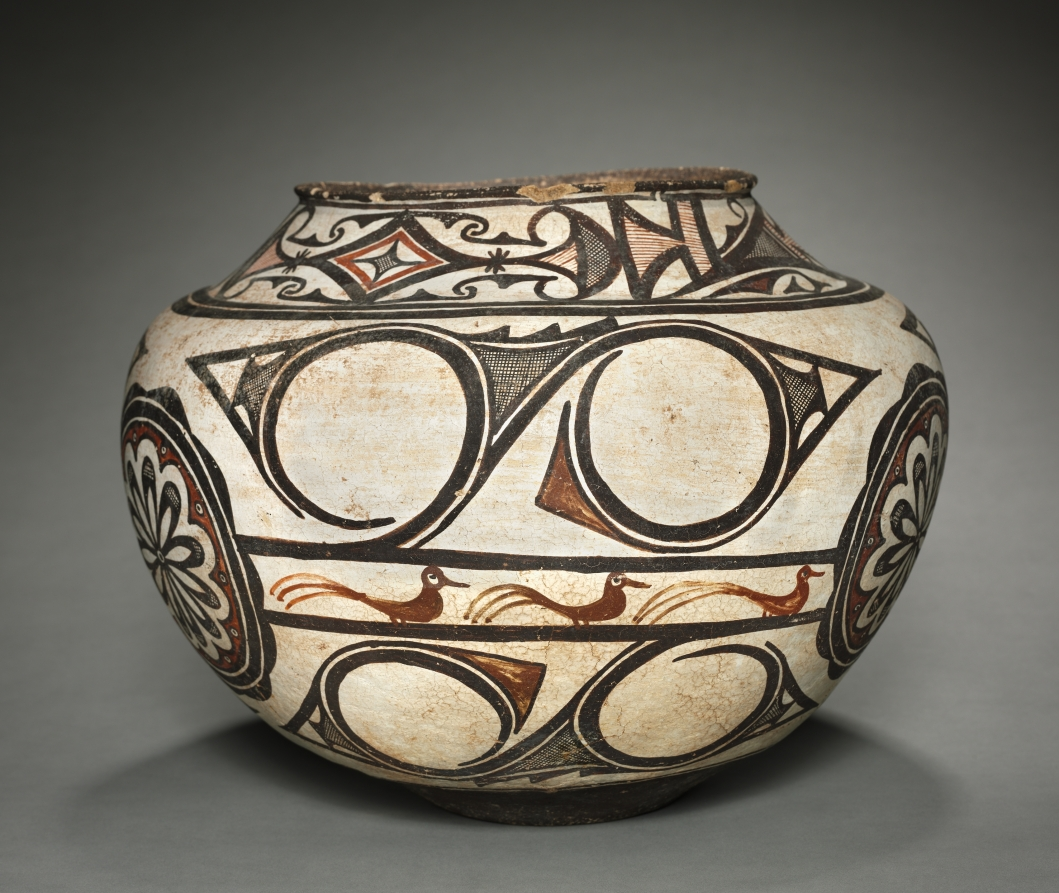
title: Water Jar (Olla) with Rosettes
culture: Native North America, Southwest, New Mexico, Zuni (A:shiwi) Pueblo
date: 1880s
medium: ceramic, slip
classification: Ceramic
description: In the past, motifs painted on Zuni (A:shiwi) ceramics likely held symbolic meanings but, if so, they are largely lost to memory—or at least the Zuni do not discuss them today. Where known, they seem to concern water, verdant crops, and abundant wildlife, also the focus of much Pueblo religious life. For instance, the large, triangular, blade-like forms around this vessel’s neck may represent the thunder knife used in many ceremonies. The petaled forms in circular rosettes refer to sunflowers.